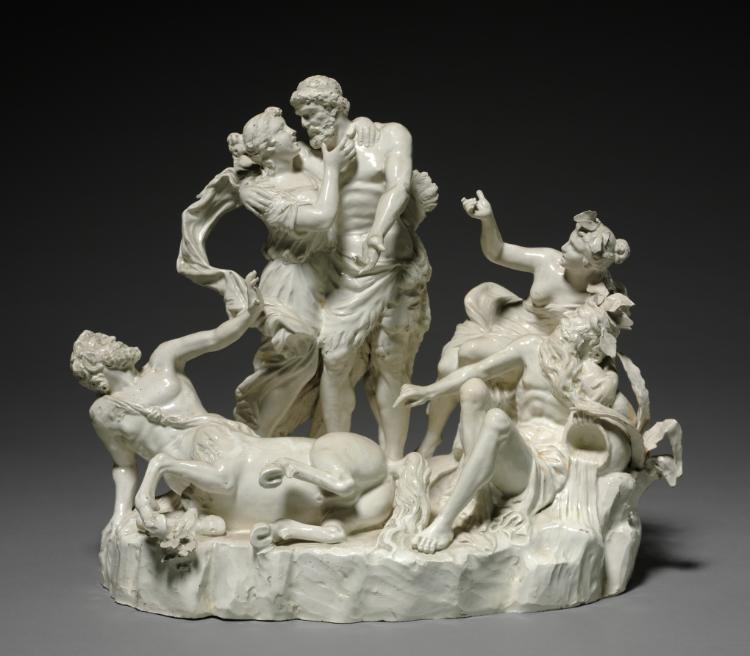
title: Hercules, Deianeira, and Nessus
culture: Italy, Naples, Capo di Monte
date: 1700s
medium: glazed ceramic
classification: Sculpture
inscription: Crowned "N" impressed in paste on the bottom.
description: Charles III, King of Naples, established the Capodimonte royal porcelain factory under his patronage in 1743. Responding to the success of Northern European porcelain factories, the Capodimonte group perfected their soft-paste porcelain and produced a variety of high-quality objects, ranging from Rococo-inspired decorative arts to more sculptural works. This unpainted figural group depicts the climax of an episode from the later life of Hercules. His heroic nature prevented Hercules from adapting to domestic life, much to the dismay of his wife, Dejanira. Growing tired of his absence, on one occasion Dejanira pursued Hercules. When she reached a river she could not cross, Dejanira accepted a ride from a centaur, Nessus, who, after taking her half way, attempted to abduct her. Here we see Dejanira clinging to her husband, who has arrived in time to slay Nessus with a poison-tipped arrow.